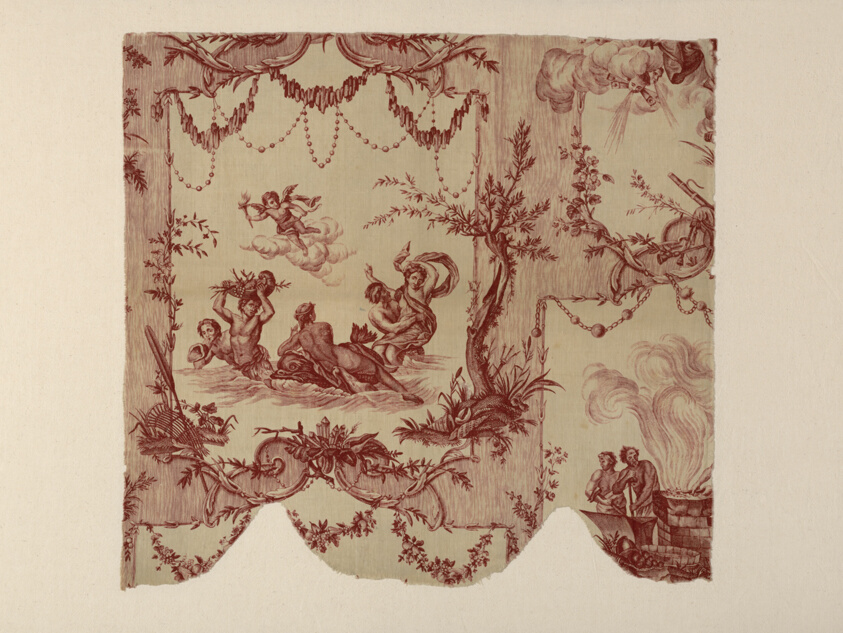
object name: Textile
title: Les Quatre Éléments (The Four Elements) (Furnishing Fabric)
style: jouy-en-Josas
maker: Probably after Jean Jacques Lagrenée le Jeune (French, 1739–1821) from engravings by Charles Dupuis (French, 1685–1742) and Louis Desplaces (French, 1682–1739) after Louis de Boullongne le Jeune (French, 1654–1733); Manufactured by Christophe-Philippe Oberkampf (naturalized French, 1738-1815), Oberkampf Manufactory (French, 1760-1843); Jouy-en-Josas, France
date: c. 1780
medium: Cotton, plain weave; copperplate printed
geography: Jouy-en-Josas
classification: textile; weaving - printed; furnishing textile